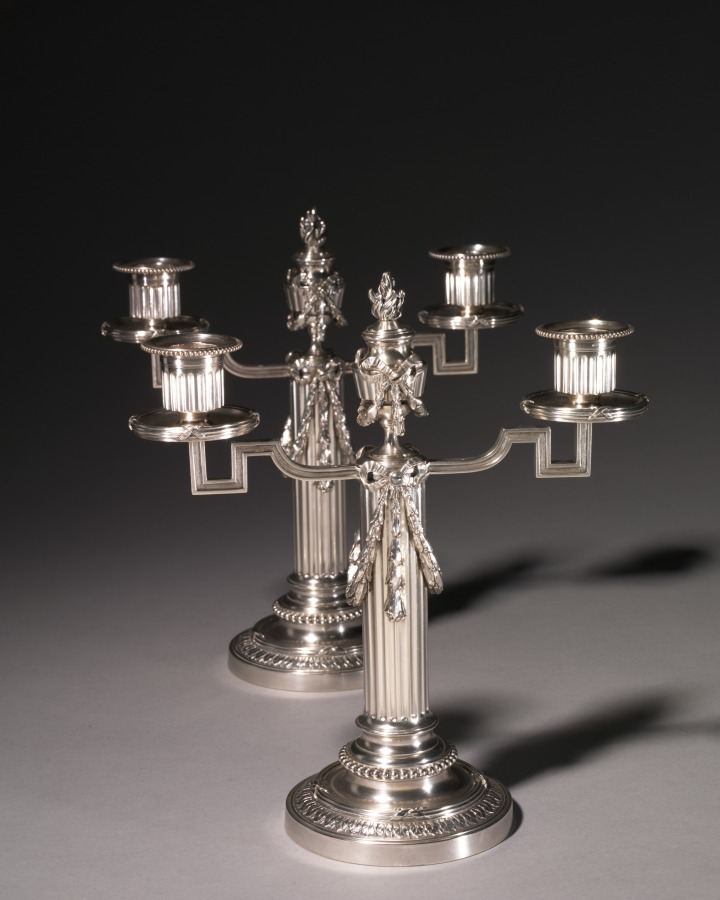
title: Pair of Candelabra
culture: Russia, St. Petersburg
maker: House of Fabergé (Russian, 1842–1918)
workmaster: Julius Alexandrovitch Rappoport (Russian, 1864–1916)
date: 1887–90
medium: silver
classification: Silver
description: This pair of candelabra demonstrates Fabergé’s commitment to a commercial balance between decorative and functional design. The pair was made by Fabergé’s chief silversmith, German-born Julius Rappoport, in Moscow, where the majority of gold and silver objects were crafted. Small in size, the pair may have been used in more intimate settings, as opposed to larger banquets or public gathering areas.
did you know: The design reflects the resurgence of the neoclassical style in the late 1800s.